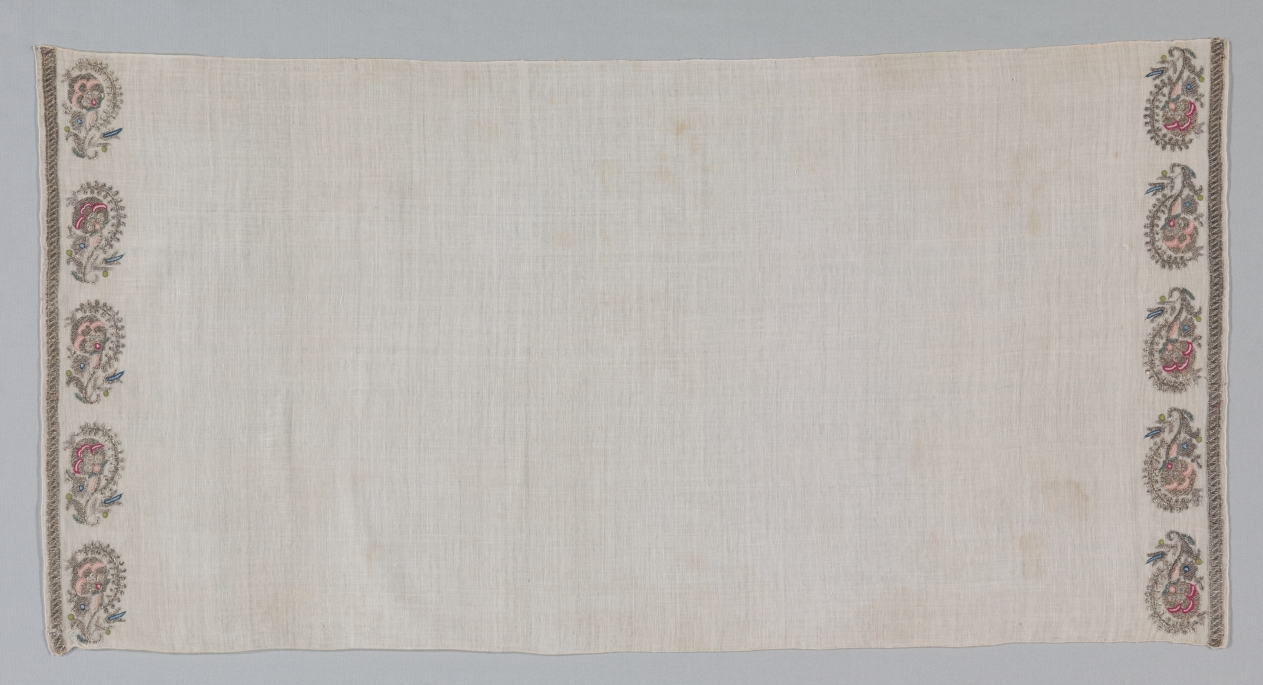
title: Embroidered Towel (Peshkir)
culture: Turkey, 19th century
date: 19th century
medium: embroidery; silk and gold filé on cotton tabby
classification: Embroidery